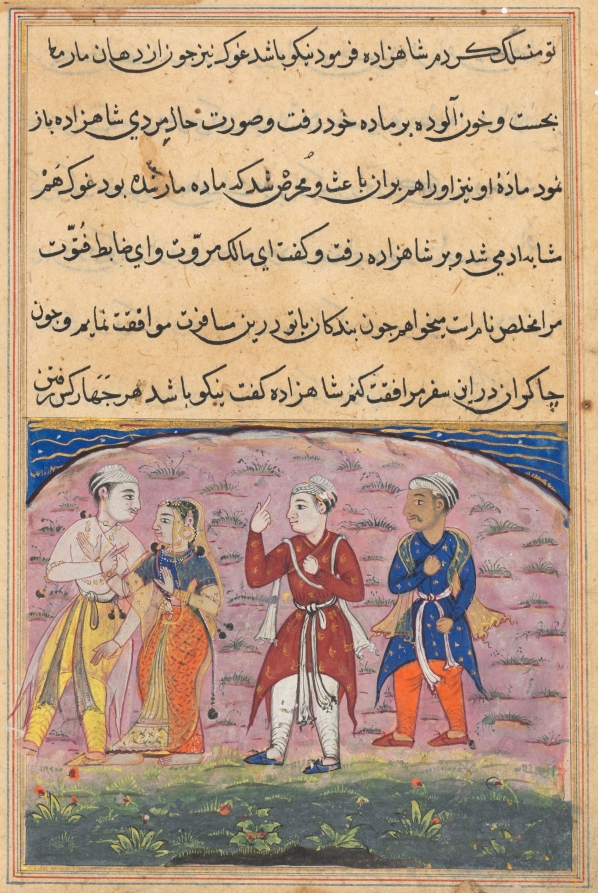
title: The prince and Nikfal are joined by Khalis and the Mukhlis who are the grateful snake and frog in human form, from a Tuti-nama (Tales of a Parrot): Eighteenth Night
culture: Mughal India, court of Akbar (reigned 1556–1605)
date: c. 1560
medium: gum tempera, ink, and gold on paper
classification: Painting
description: The prince, wearing yellow pants, with Nikfal (Good Fortune) by his side, looks back to see two men approaching. They introduce themselves as the cobra, whom the prince fed from his own flesh, and the frog, whose life he saved. They took on human forms and pledged to be his servants until they have returned the favor of his kindness. At the bottom of the page is the edge of a pool painted in silver paint that has tarnished black. Grass and poppies grow on its banks. The otherwise arid landscape has been painted pink with sparse grassy tufts.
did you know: The men wear Central Asian pants and tunic, while the woman wears Indian dress.